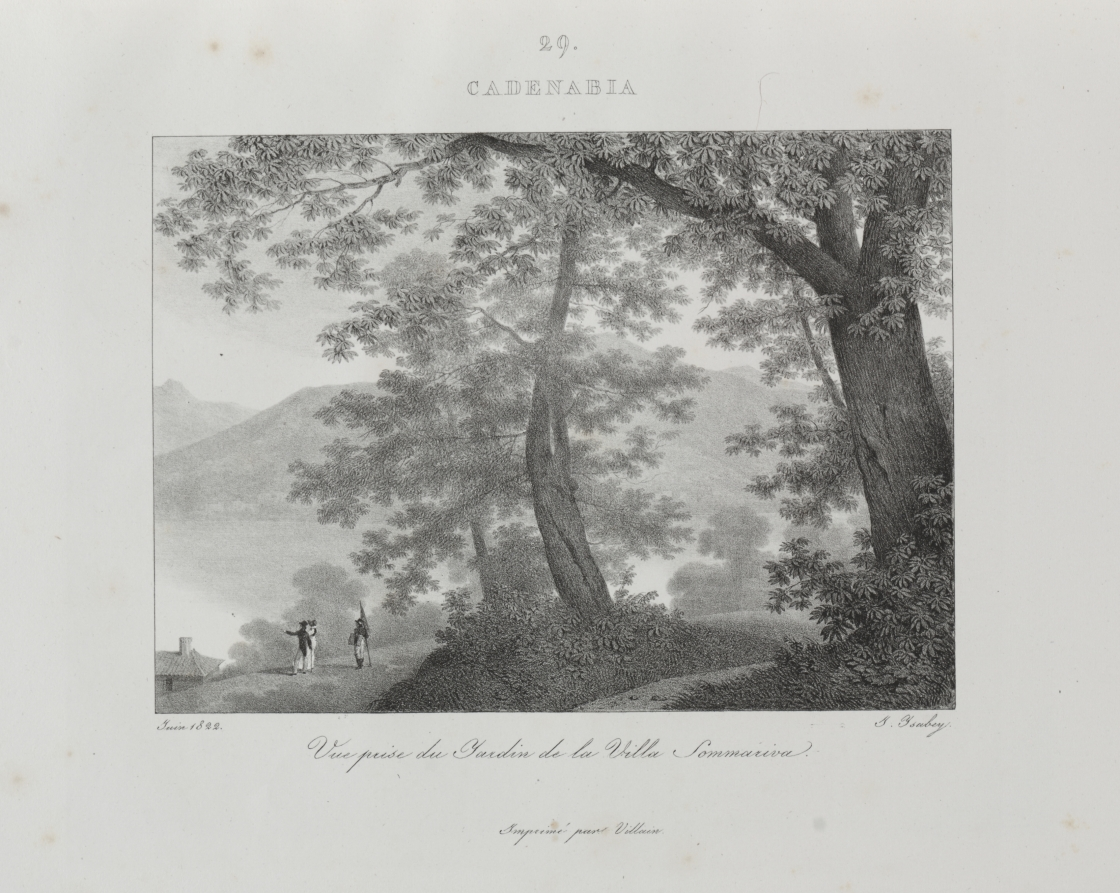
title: Voyage en Italie en 1822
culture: France, 19th century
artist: Jean-Baptiste Isabey (French, 1767–1855)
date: 1833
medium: lithograph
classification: Bound Volume